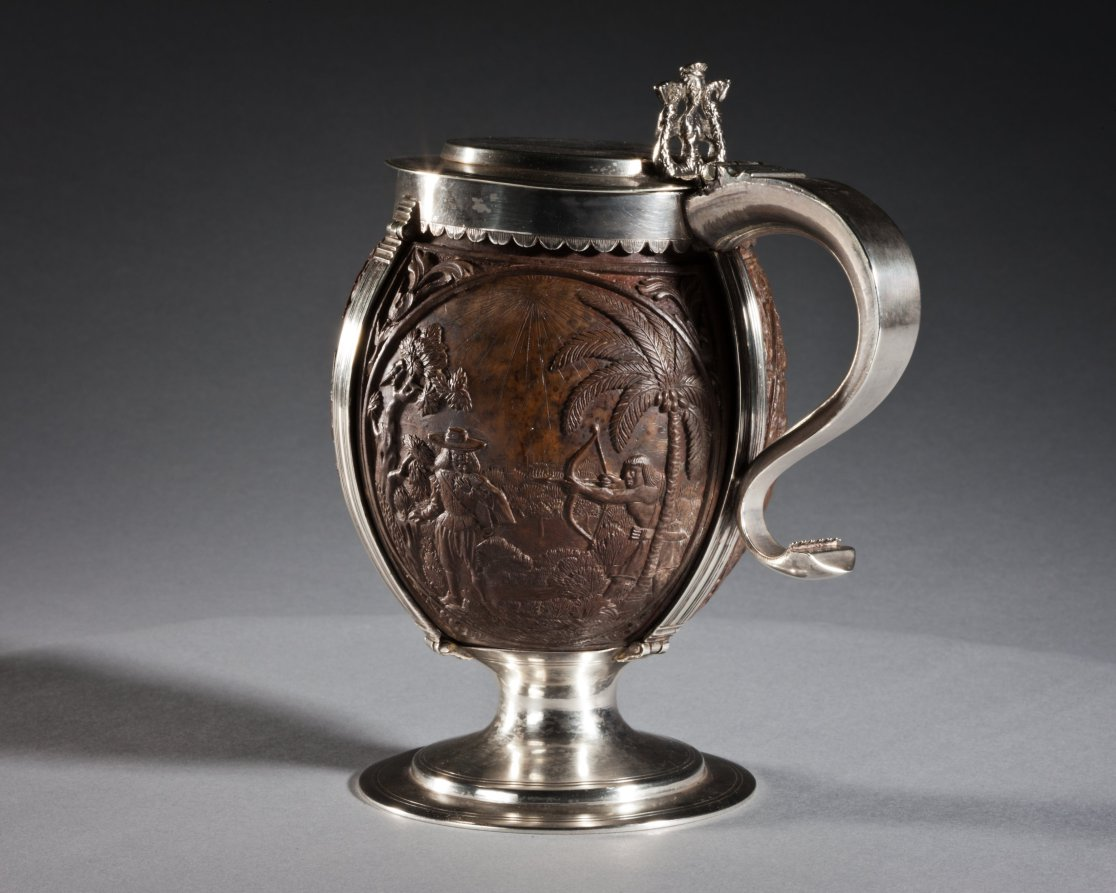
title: Coconut Cup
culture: carved coconut, probably The Netherlands; silver mount, probably England, 17th century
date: c. 1630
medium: carved coconut in silver mount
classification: Metalwork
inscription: top lid has engraved coat-of-arms, underside of lid has inscription: George Lewis TIVERTON Feby, 1st 1760.